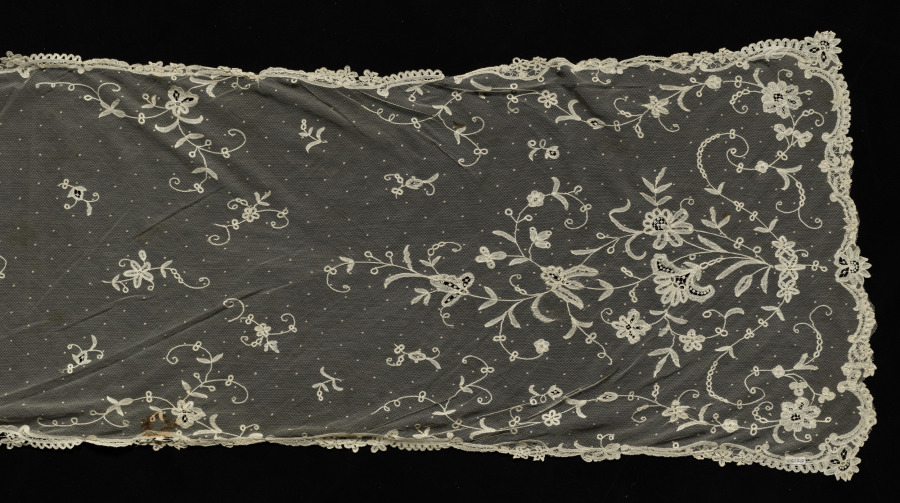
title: Lace Scarf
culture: Belgium, Brussels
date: 1800s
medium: Machine-made lace net: linen bobbin lace appliqué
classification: Lace